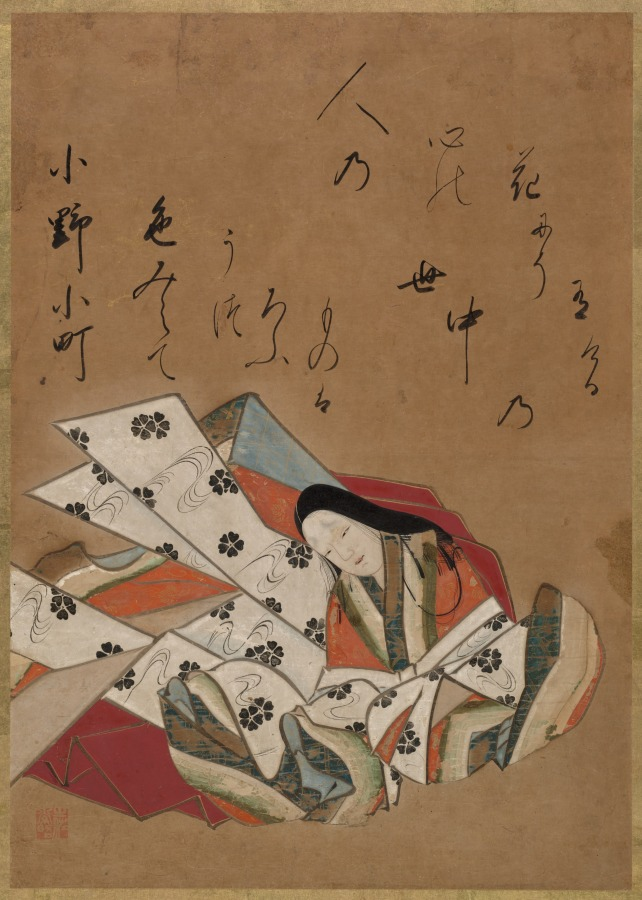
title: The Poet Ono no Komachi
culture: Japan, Edo period (1615–1868)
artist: Shokadō Shōjō (Japanese, 1584–1639)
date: early to mid-1600s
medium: album leaf; ink and color on paper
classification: Painting